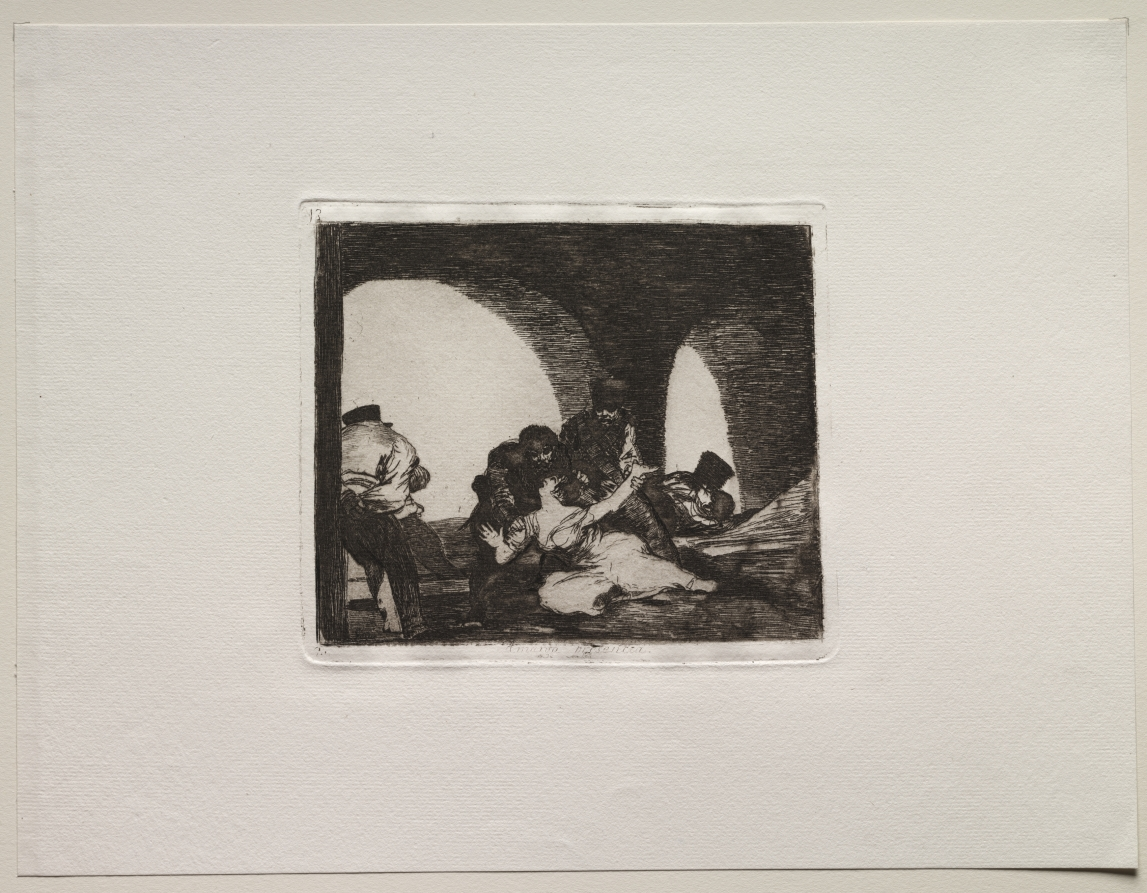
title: The Horrors of War: Bitter to be Present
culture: Spain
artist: Francisco de Goya (Spanish, 1746–1828)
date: c. 1810–20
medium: etching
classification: Print